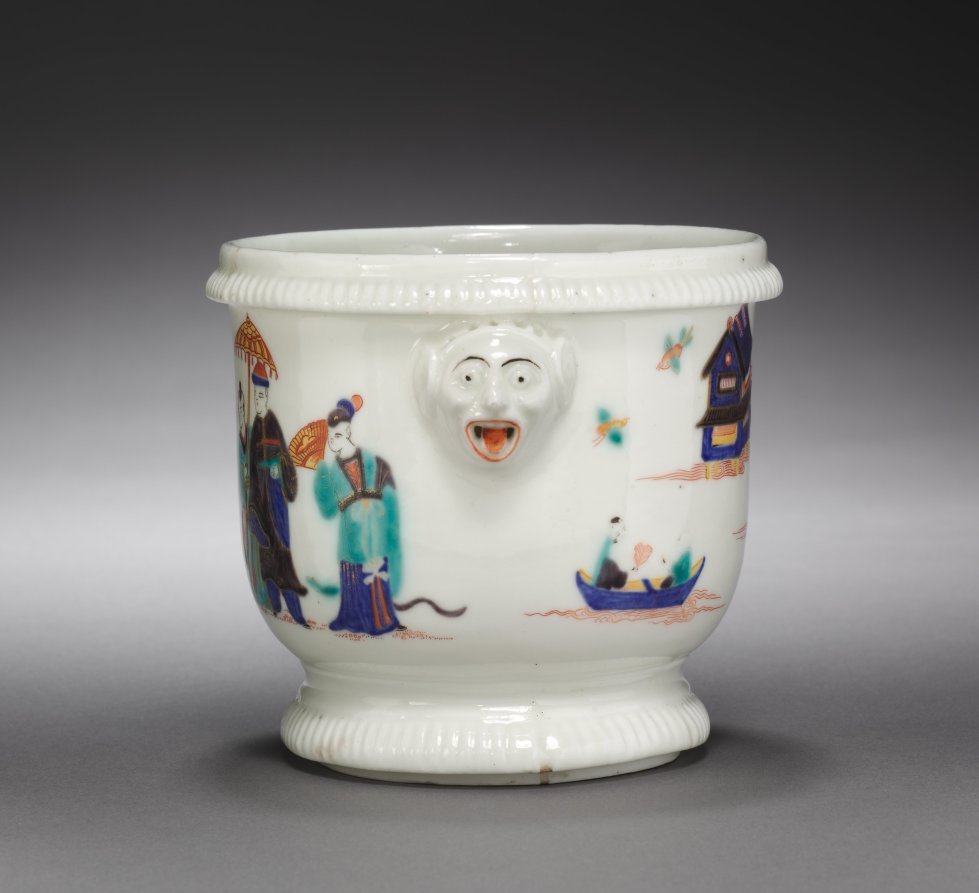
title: Bottle Cooler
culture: France, Saint Cloud, 18th century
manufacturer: Saint Cloud Porcelain Factory (French)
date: c. 1725– 1735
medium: soft-paste porcelain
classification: Ceramic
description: The form of these cachepots is entirely typical of Saint-Cloud porcelain of about 1725. Their decoration, based upon Chinese porcelains of the so-called "famille-verte" type, is most unusual. Polychromed enamels were not often employed on Saint-Cloud porcelains, and figural scenes are very rare.